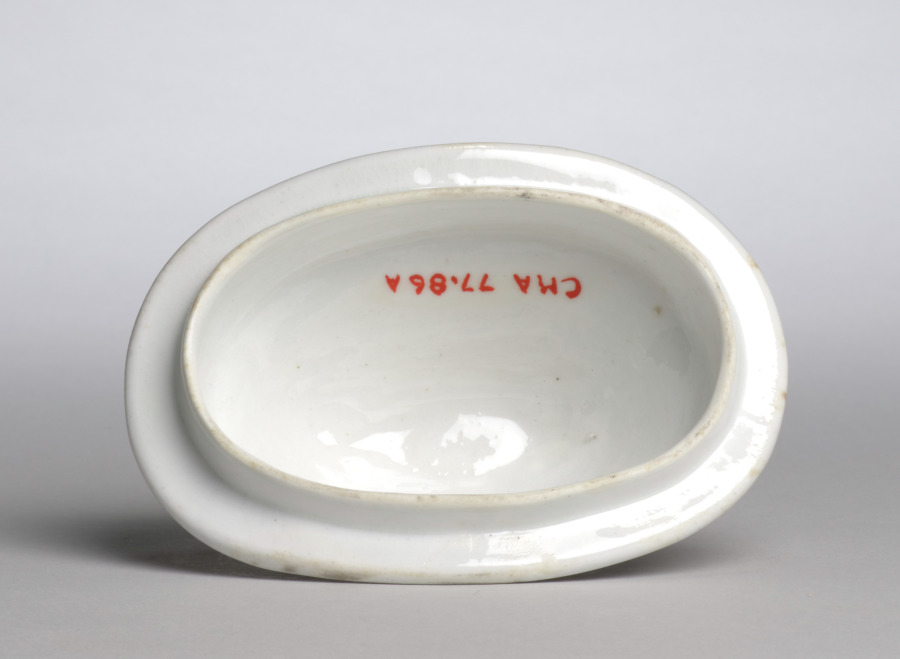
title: Sugar Bowl and Lid (lid)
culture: England, 19th century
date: c. 1800–1825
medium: earthenware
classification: Ceramic